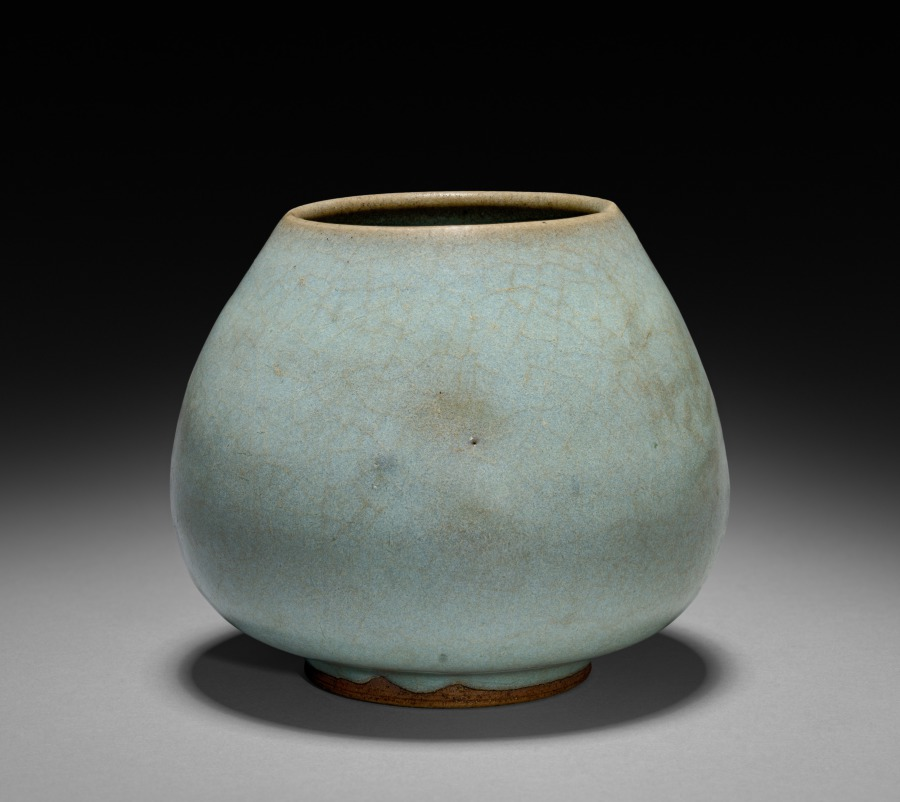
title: Lotus Bud Jar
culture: Northern China, Northern Song dynasty (960-1127) - Jin dynasty (1115-1234)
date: 1100s–1200s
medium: stoneware, Jun ware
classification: Ceramic